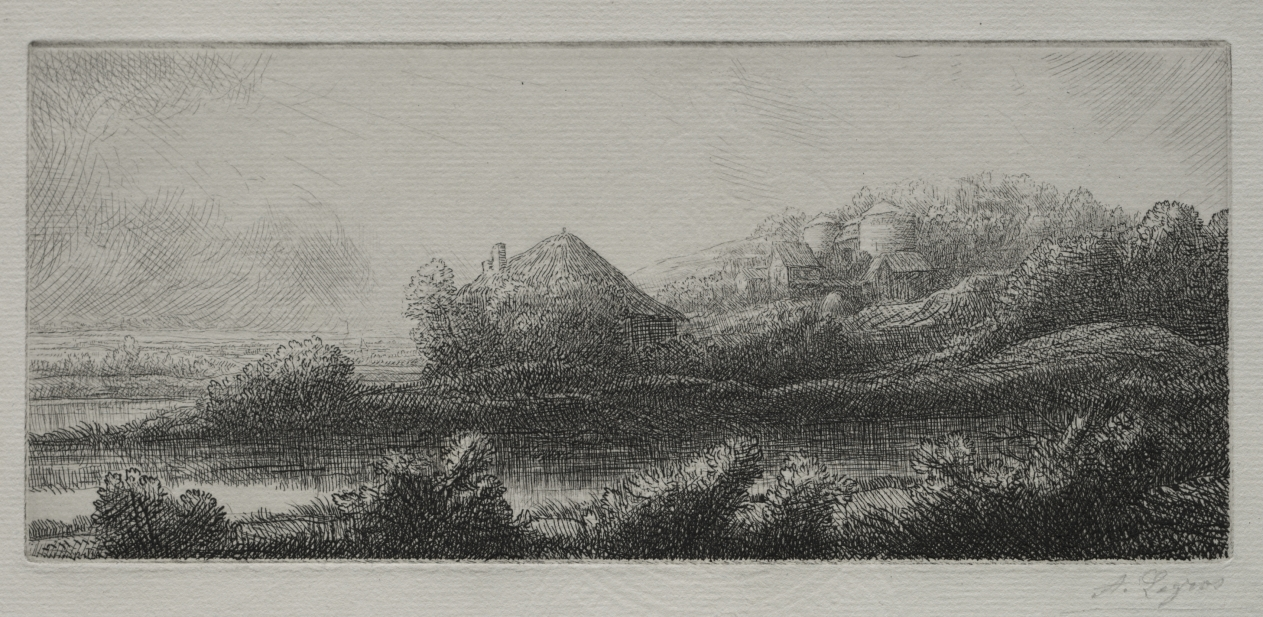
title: Cabin in the Marsh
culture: France, 19th-20th century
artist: Alphonse Legros (French, 1837–1911)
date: c. 1857–1911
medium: etching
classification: Print